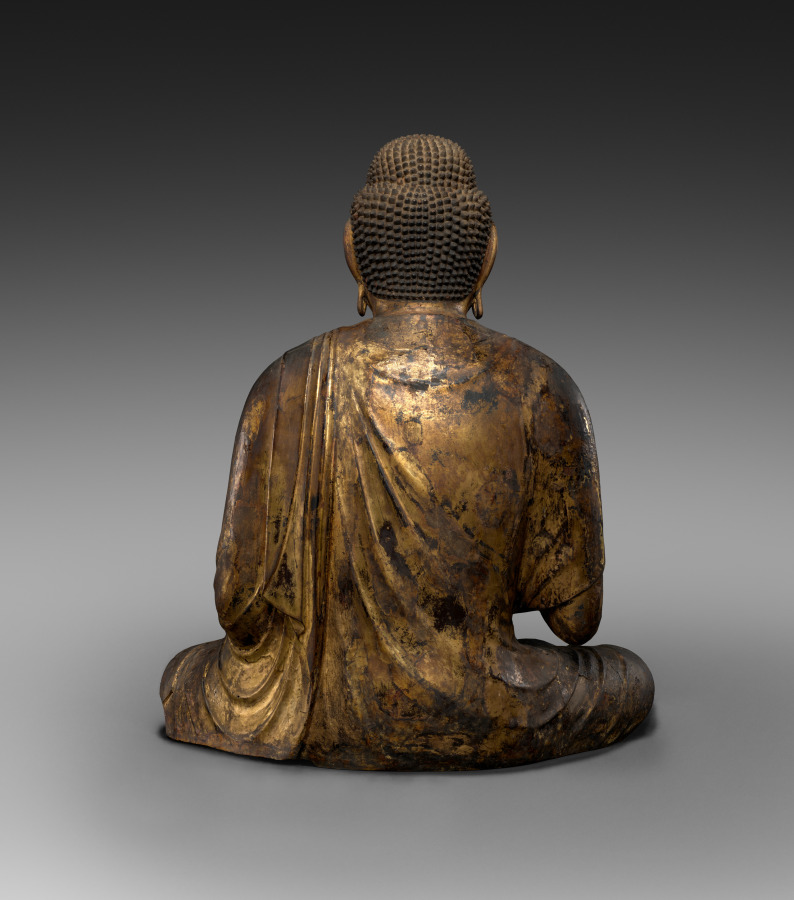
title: Seated Buddha (sculpture)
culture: Japan, Heian period (794–1185)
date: 1100s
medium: gilded wood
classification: Sculpture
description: Composed of a number of hollowed-out pieces of wood that were then covered with lacquer and gilding, this sculpture served as an image of worship in one of the small temples surrounding Kōfukuji, a major Buddhist temple in Nara, Japan. Like many Buddhas, this figure has its right hand positioned in a gesture meaning "fear not." The left hand is a replacement, so its original gesture, a clue to this Buddha's identity, is unknown. However, as the left foot is exposed over the garment, in lotus position, it may have been created as a Medicine Master Buddha, Yakushi Nyorai in Japanese, or the Buddha of our era, Shakyamuni.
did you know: This Buddha is sculpted in the Jōchō style, associated with the sculptor of the Amida at Byōdō'in in Uji.